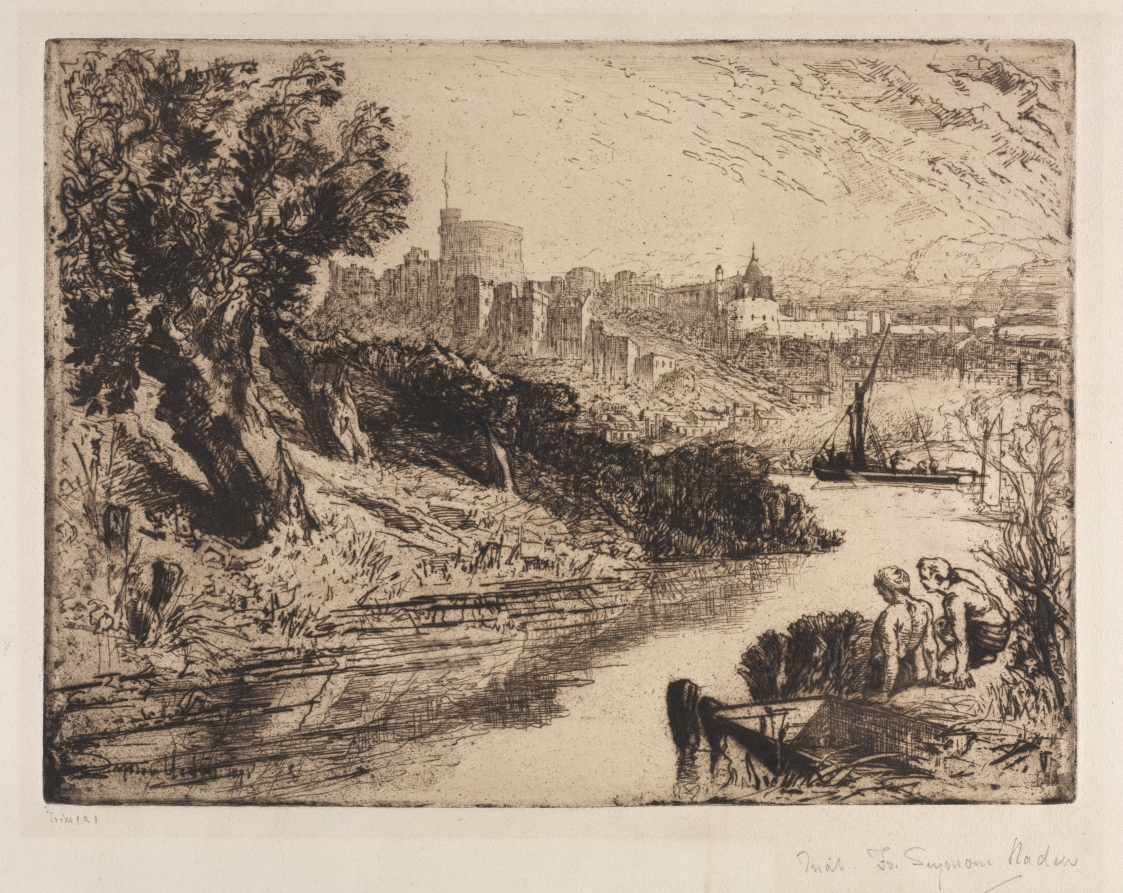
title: Windsor Castle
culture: England, 18th century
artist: Francis Seymour Haden (British, 1818–1910)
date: 1878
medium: etching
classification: Print